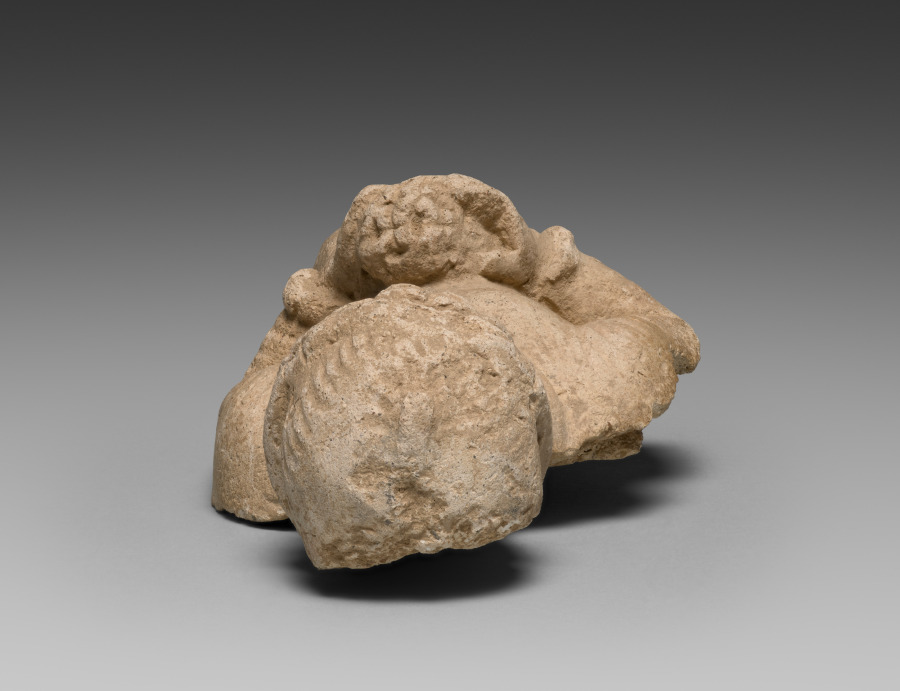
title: Layman bearing offerings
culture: Afghanistan, Hadda, probably Tape Shotor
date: c. 300 CE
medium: stucco with mother-of-pearl inlay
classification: Sculpture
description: The Buddhist monasteries at Hadda were famous internationally until their destruction by fire in the 800s CE. One thousand years later, a British explorer named Charles Masson (1800–1853) documented the site and collected many sculptures from the ruins that are now in the British Museum in London. French archaeologists carried out systematic excavations between 1926 and 1929. They brought many sculptures to the National Museum of Asian Art, Guimet, in Paris. Some sculptures entered other museum and private collections around the world. In the 1970s, Afghan archaeologists continued to document the Buddhist sites of Hadda and brought many more sculptures to the National Museum of Afghanistan in Kabul.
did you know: The Buddhist community (sangha) consists of both monks and laypeople who brought wealth to support the monasteries at Hadda.